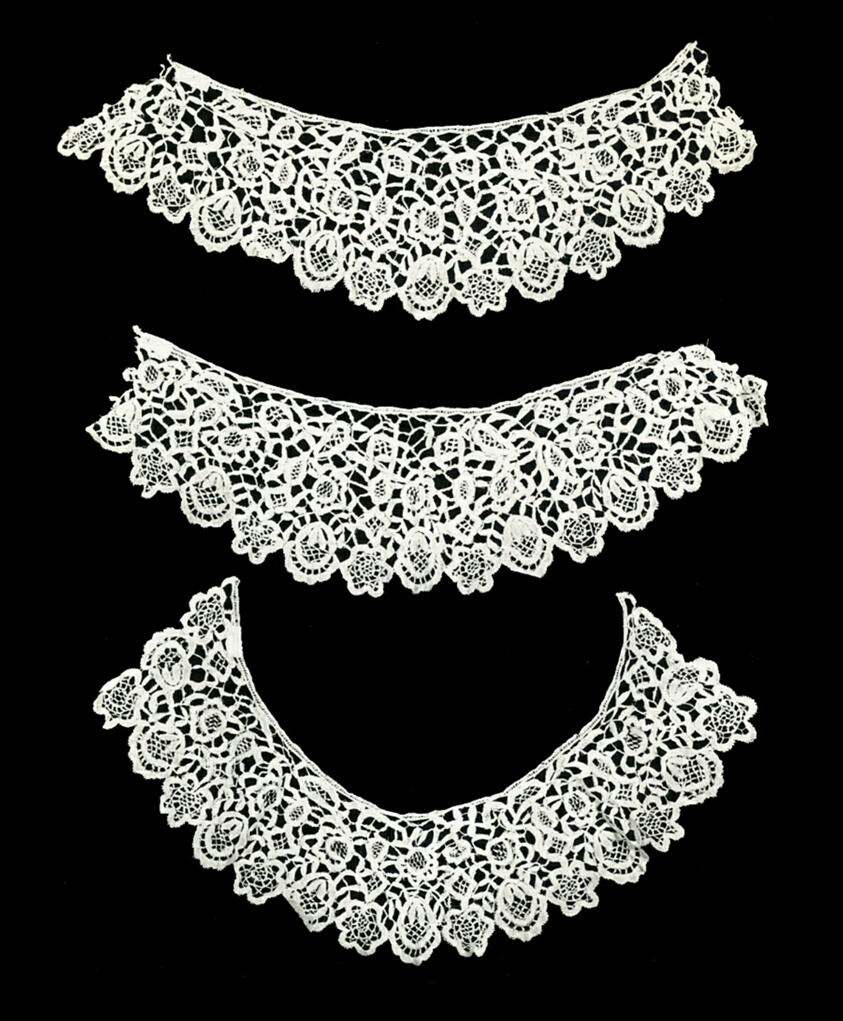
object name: Textile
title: Collar and Two Cuffs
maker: England, Honiton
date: 1850/75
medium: Cotton and linen, bobbin part lace of a type known as "Honiton" with clothwork tape and plaited bar ground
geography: England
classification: textile; lace - bobbin